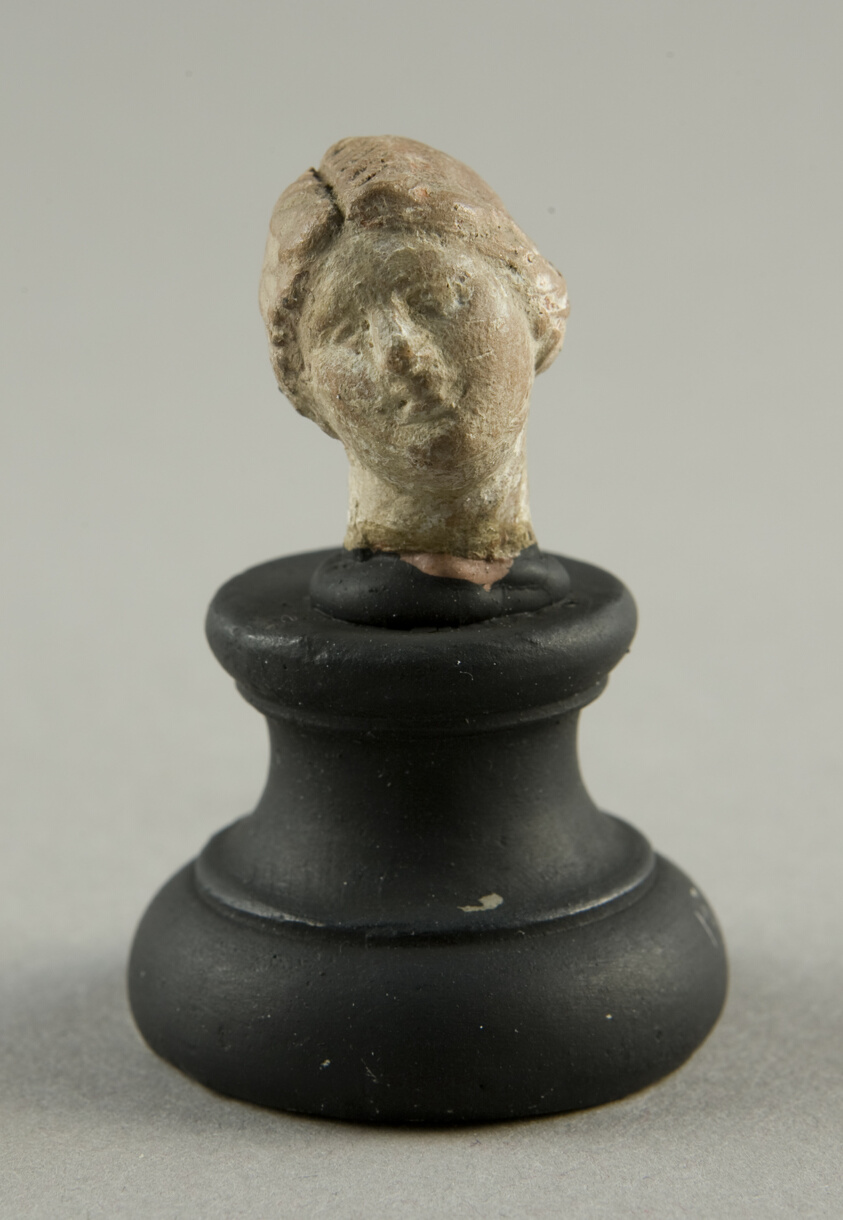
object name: Sculpture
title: Head of a Woman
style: greek, ancient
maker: Greek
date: 3rd-2nd century BCE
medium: terracotta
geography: Greece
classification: earthenware; ceramics; sculpture; ancient art